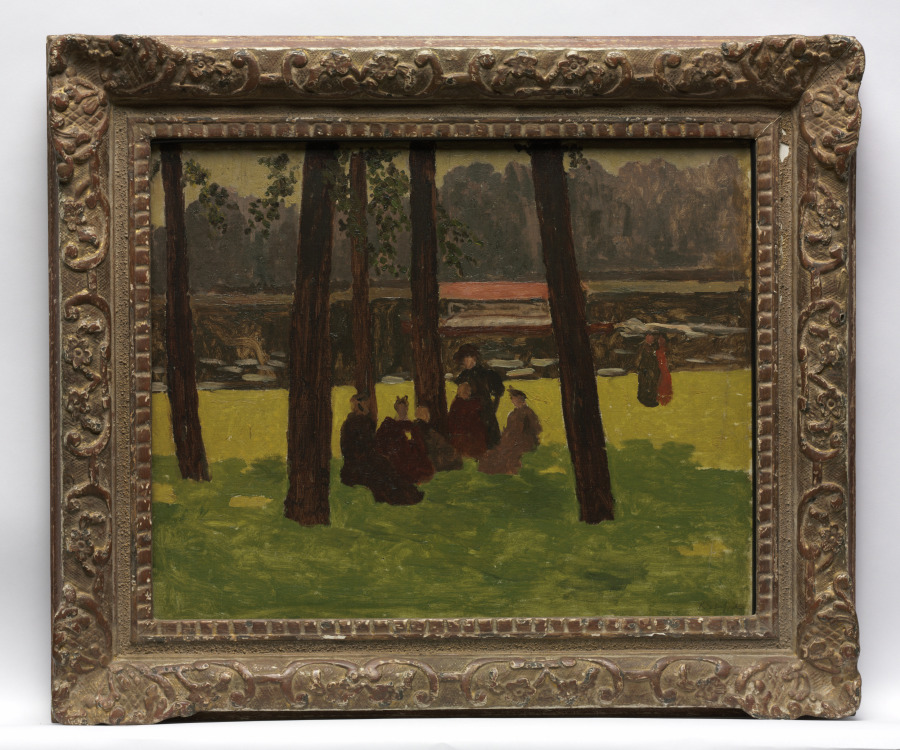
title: Women Meeting in the Shade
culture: France, 19th century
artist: Ker Xavier Roussel (French, 1867–1944)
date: c. 1890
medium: oil on canvas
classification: Painting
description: Roussel was a founding member of the French avant-garde group known as the Nabis (prophets) and the brother-in-law of fellow member Édouard Vuillard. Roussel shared their fascination with Japanese prints and developed a style of radically simplified forms and strong, decorative color. His intimate views of daily life convey a mood of quiet feeling rather than focusing on narrative, storytelling content. This painting depicts a group of figures, presumably two women and four children, meeting in the shade of tall trees, while other figures walk along the grassy riverbank.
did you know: Known mostly for his small Nabis paintings of the 1890s, Roussel also produced large murals for the Théâtre des Champs-Élysées and the Palais de Chaillot in Paris, and the Palais des Nations in Geneva.